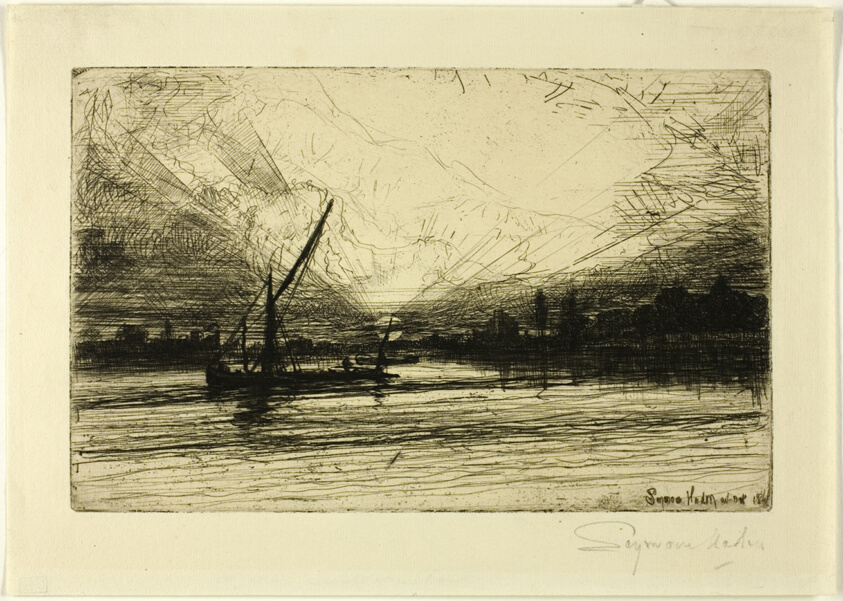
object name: Print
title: Sunset on the Thames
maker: Francis Seymour Haden (English, 1818-1910)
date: c. 1865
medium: Etching and drypoint on ivory laid paper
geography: England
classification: etching; print; prints and drawing